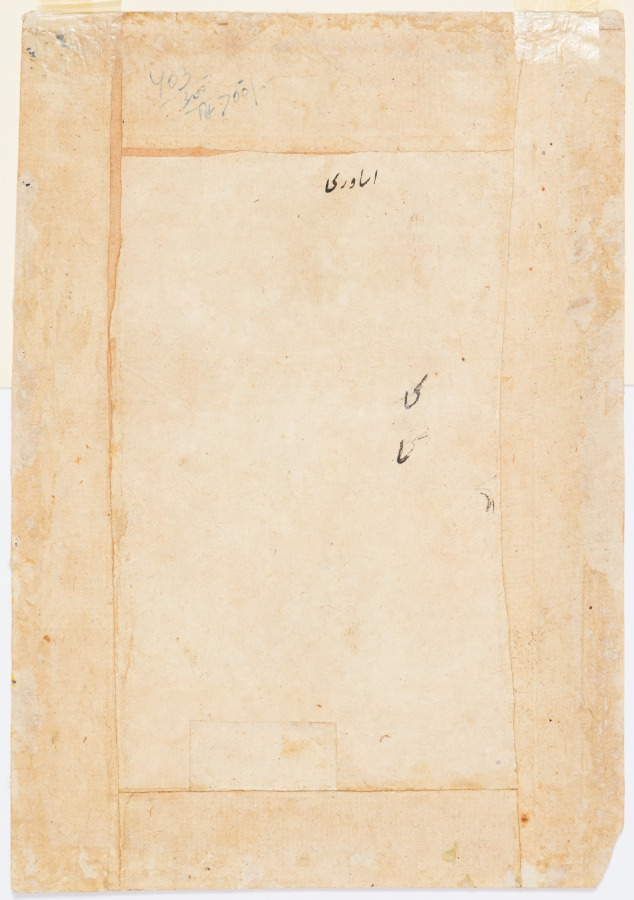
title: Ascetic Princess with Snakes in a Wilderness: Asavari Ragini, from a Ragamala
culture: Northwestern India, Rajasthan, Rajput Kingdom of Bikaner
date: c. 1650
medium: gum tempera and gold on paper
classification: Painting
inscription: asāvarī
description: According to a theme explored in various examples of Indian poetry and literature, a princess has fled her royal life to live alone on an island in the forest. She has skillfully made a skirt and hut of leaves and vines. Suffering deprivation and practicing yogic disciplines, she has achieved the power to peacefully commune with the water snakes, who are mystically drawn to her.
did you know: This painting once belonged to the filmmaker James Ivory (American, b. 1928).